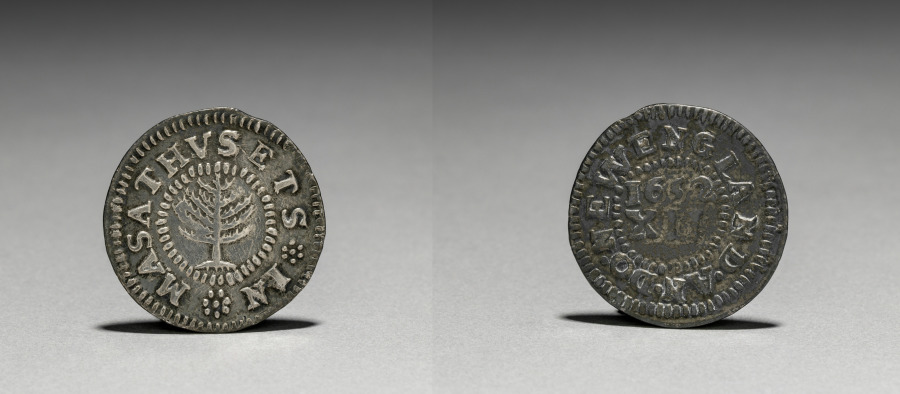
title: Shilling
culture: America, Massachusetts, Boston, 17th century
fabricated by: John Hull (American, 1624–1683)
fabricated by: Robert Sanderson (American, 1609–1693)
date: 1652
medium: silver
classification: Coins